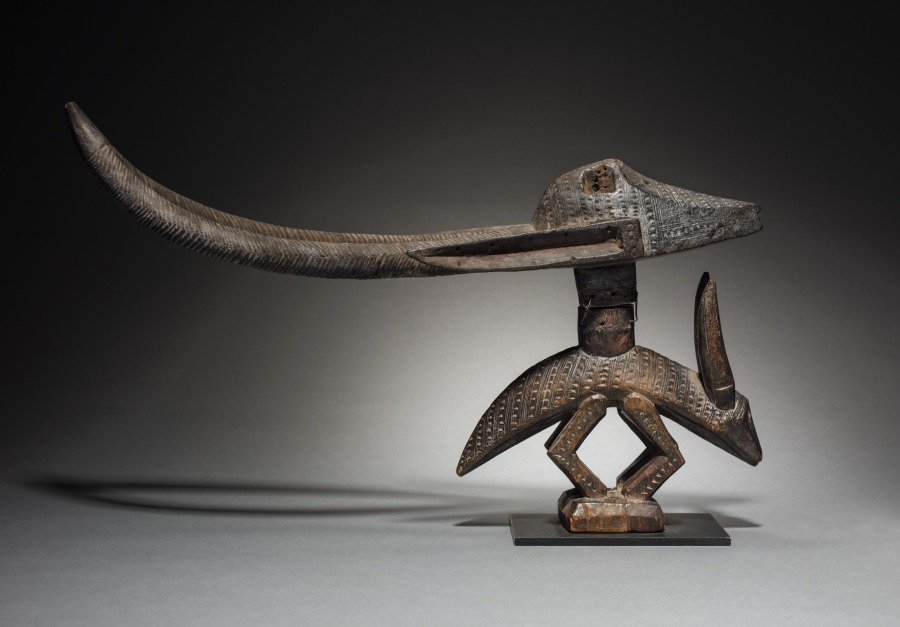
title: Double-Headed Headdress (N'gonzon Koun)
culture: Africa, West Africa, Mali, Bamana-style blacksmith-carver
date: 1900s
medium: Wood and iron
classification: Mask